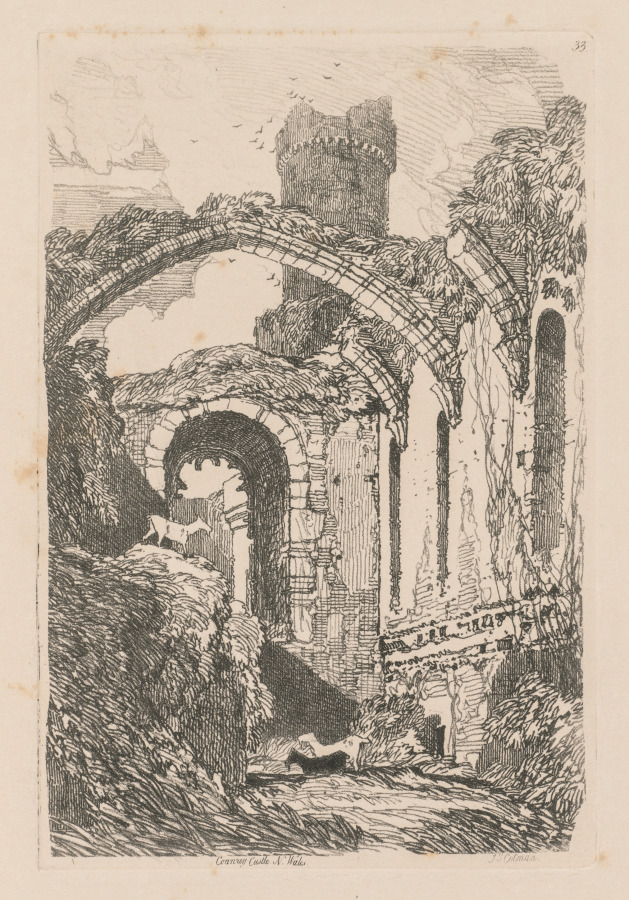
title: Liber Studiorum: Plate 33, Conway Castle, N. Wales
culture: England, 19th century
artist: John Sell Cotman (British, 1782–1842)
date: 1838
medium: softground etching, from a bound volume containing 48 plates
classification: Bound Volume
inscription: In plate, within image, upper right: 33; in plate, below image: Conway Castle. N. Wales. JS Cotman